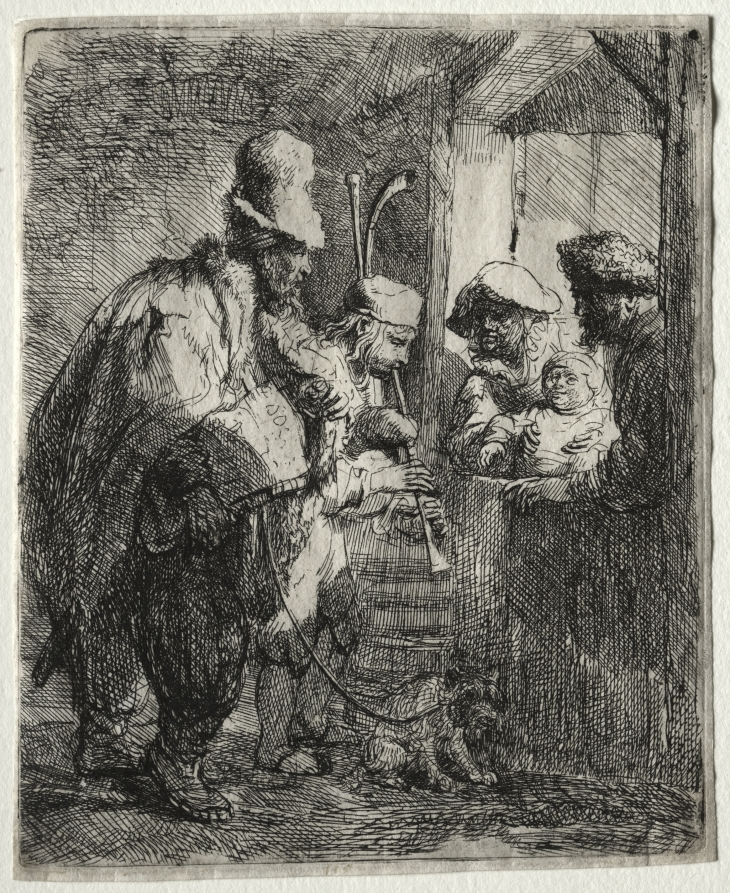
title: The Strolling Musicians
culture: Netherlands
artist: Rembrandt van Rijn (Dutch, 1606–1669)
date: c. 1635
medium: etching and drypoint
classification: Print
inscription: lower center, in pen and brown ink: 145 ; VERSO, lower left, in graphite: 119 ; lower left, in pen and brown ink: HCX ; lower left, in graphite: [illegible]23 ; lower left, in graphite: B. 119 ; lower center, in graphite: N° 115 ; lower center, in graphite: 1rst state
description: Although 17th-century Holland produced neither noteworthy composers nor renowned performers, rarely has another culture produced so many visual images of music as the Dutch. In this depiction of a pair of itinerant musicians wearily shuffling from door to door, Rembrandt reveals his compassionate understanding of human frailties. The hurdy-gurdy and bagpipes, as depicted here, were frequently associated with itinerant beggars and blind street singers in paintings and prints of the period.